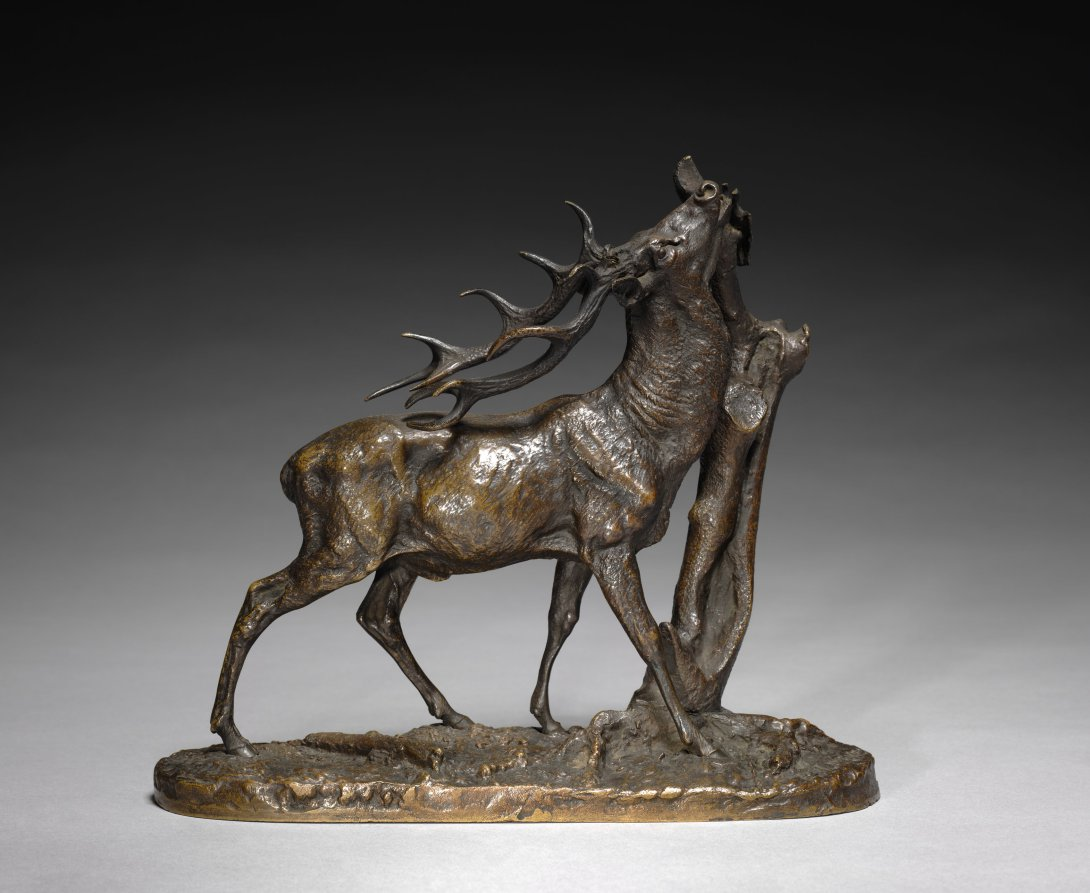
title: Stag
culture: France, 19th century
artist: Pierre Jules Mène (French, 1810–1879)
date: c. 1825 – 1879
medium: bronze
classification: Sculpture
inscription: Signed: "P. J. Mene"